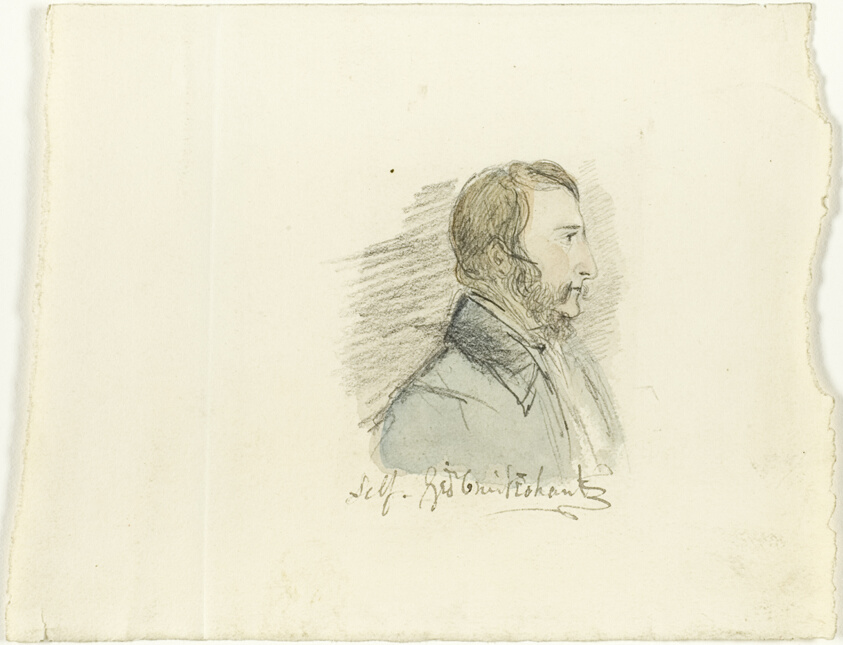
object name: Drawing and Watercolor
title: Self-Portrait in Profile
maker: George Cruikshank (English, 1792-1878)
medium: Graphite and watercolor, on cream wove paper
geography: England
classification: watercolor; drawings (visual works); prints and drawing